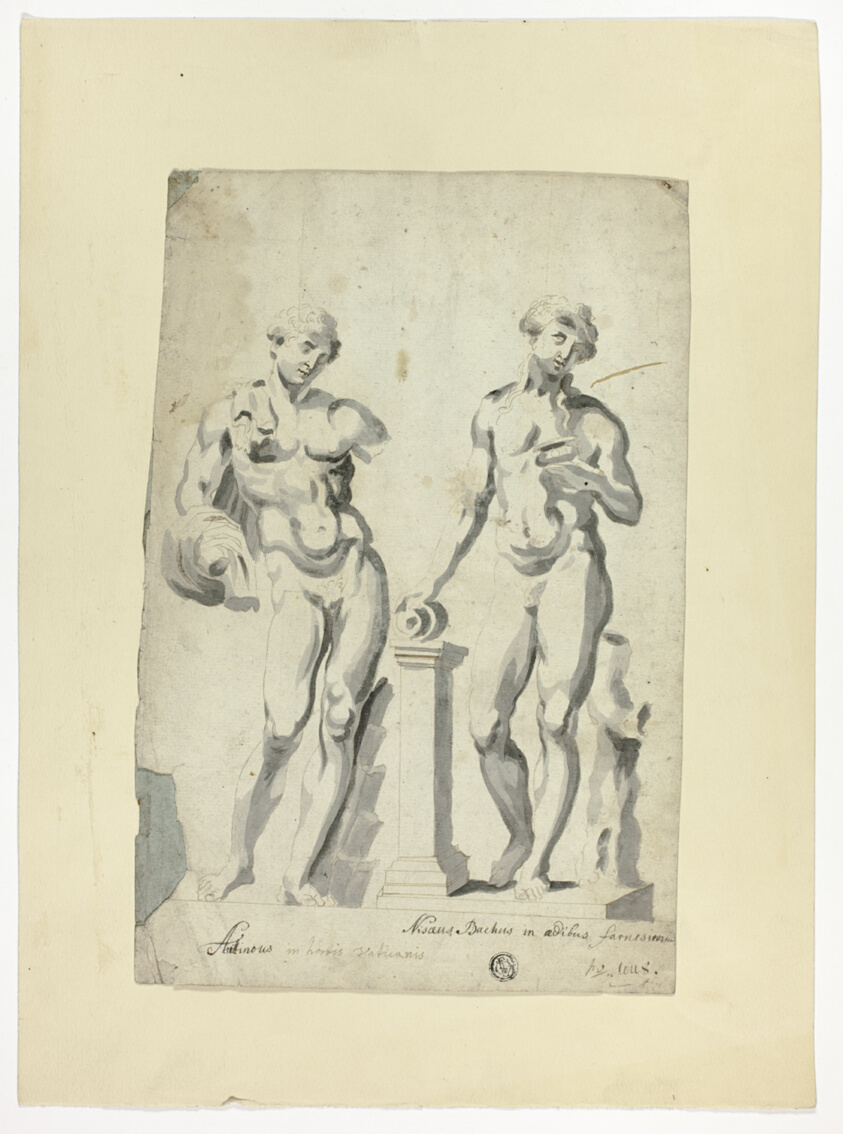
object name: Drawing and Watercolor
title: Two Sculptures: Antinous in Vatican Gardens and Nisaus Bacchus in the Farnese Palace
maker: Unknown Artist; European, 1500-1800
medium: Pen and brown ink, and brush and bluish-gray wash, on ivory laid paper, tipped on blue laid paper, tipped on cream wove paper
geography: Europe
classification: ink or chalk wash; drawings (visual works); prints and drawing